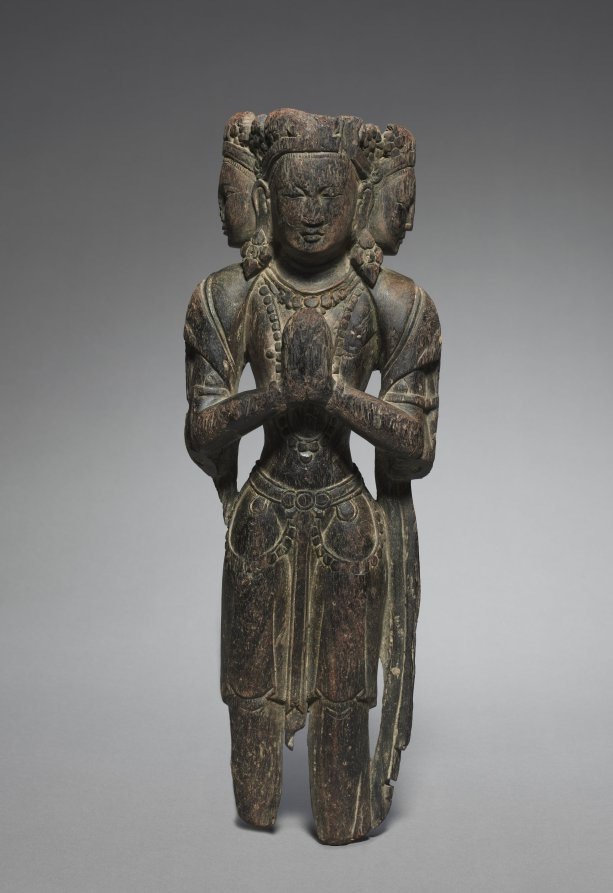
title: Bodhisattva Avalokitesvara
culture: Himalyas, probably Tibet, 10th-12th century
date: 900–1200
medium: wood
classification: Sculpture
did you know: Holes left from wooden pegs indicate the figure originally had more arms and an additional level of heads.